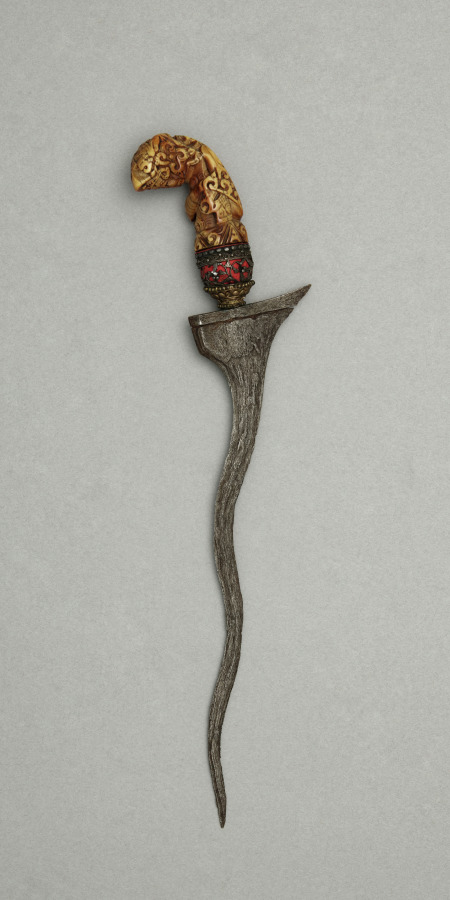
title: Dagger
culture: Philippines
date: before 1916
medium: Blade: metal; handle: ivory with silver mounting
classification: Arms and Armor